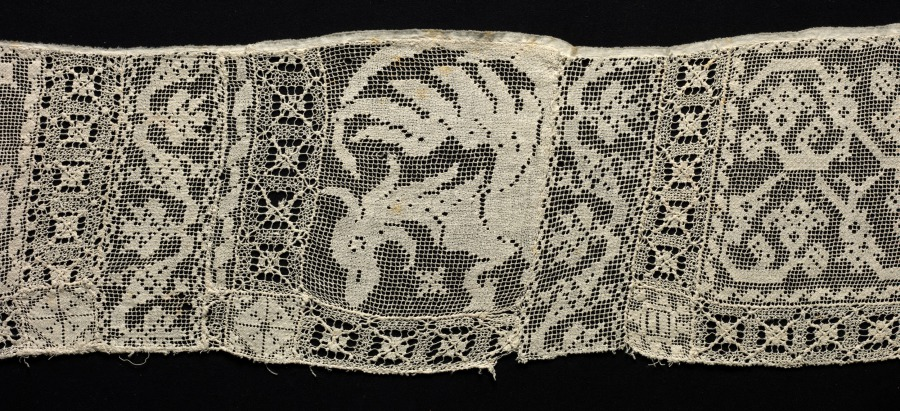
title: Band with Various Fantastic Creatures and Vegetal Patterns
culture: Italy, 1800s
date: 1800s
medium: Bleached linen (est.): needle lace, filet/lacis (knotted ground and darned in two directions)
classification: Lace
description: The reversed and backward orientation of many of the squares in this band of lace suggests that this was not their original layout. They were most likely taken apart and later joined back together in a disoriented manner.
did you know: The square showing a man in midair above a bull-like creature is reminiscent of the Minoan "Bull Leaping" fresco at the Knossos palace complex.